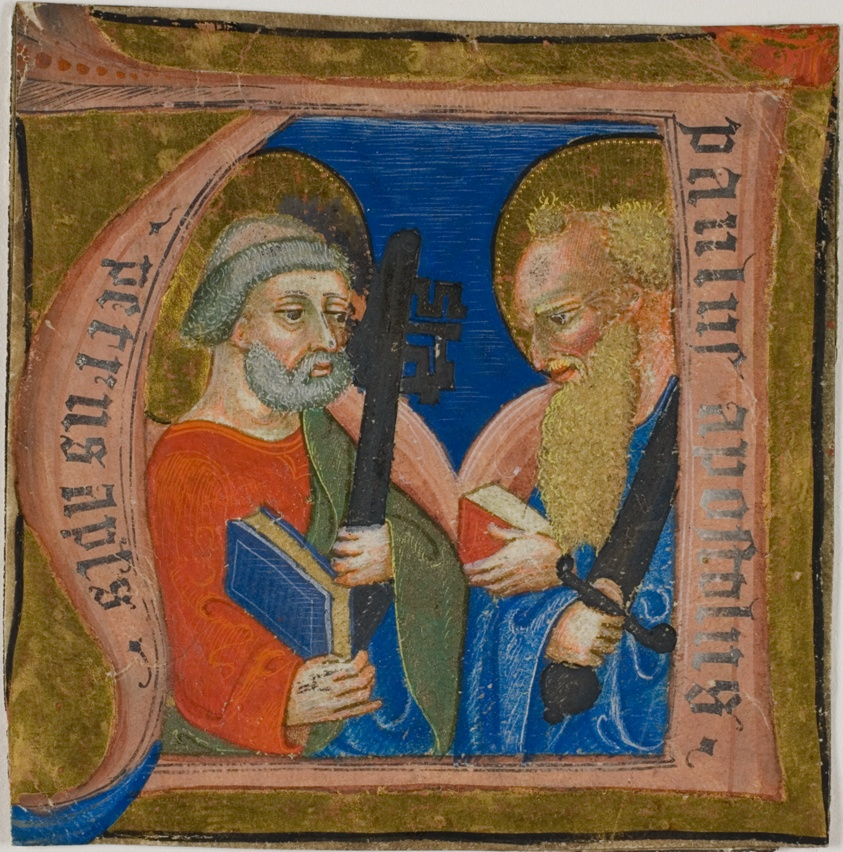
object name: Drawing and Watercolor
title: Saints Peter and Paul in a Historiated Initial "N" from a Choirbook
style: medieval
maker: Italian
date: 1375/99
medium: Manuscript cutting in tempera and gold leaf, with gothica textualis inscriptions in silver ink, on parchment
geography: Italy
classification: tempera; manuscript; drawings (visual works); prints and drawing